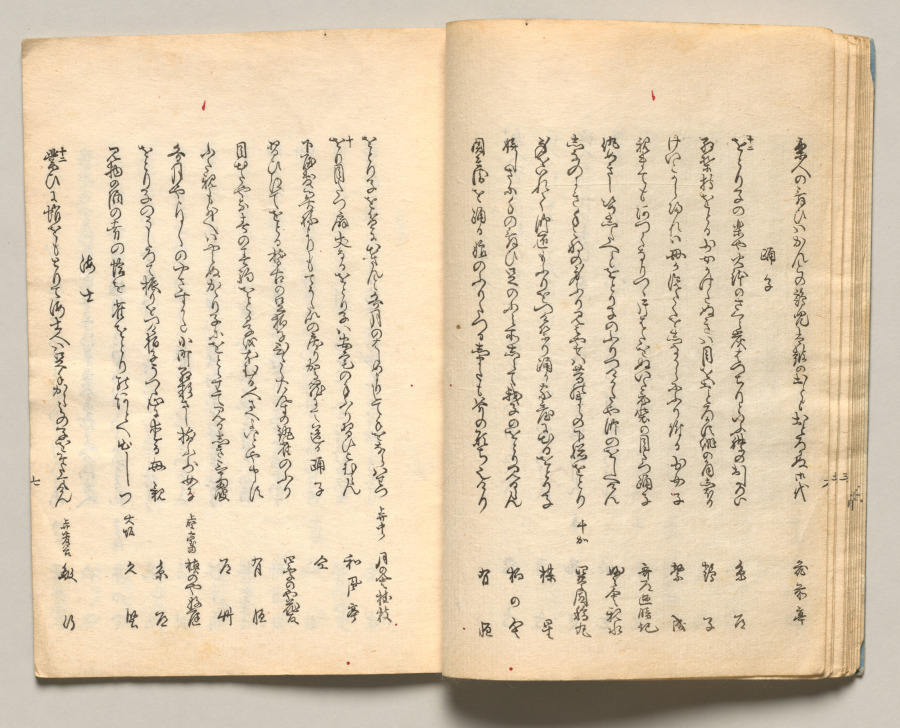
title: Spread Fourteen from Volume Three of People of Japan in Light Verse (Kyōka)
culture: Japan, Edo period (1615–1868)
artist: Utagawa Hiroshige (Japanese, 1797–1858)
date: 1857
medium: Woodblock-printed book; ink and color on paper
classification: Bound Volume